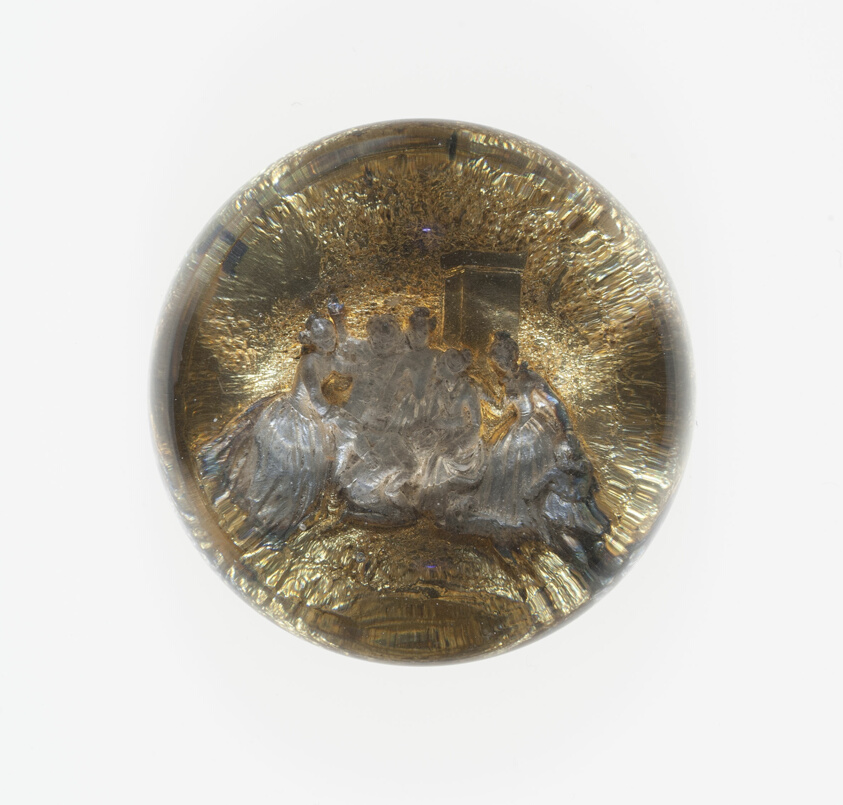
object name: Glass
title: Paperweight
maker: European, possibly English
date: c. 1848–60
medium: Glass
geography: England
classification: paperweight; glass; european decorative arts